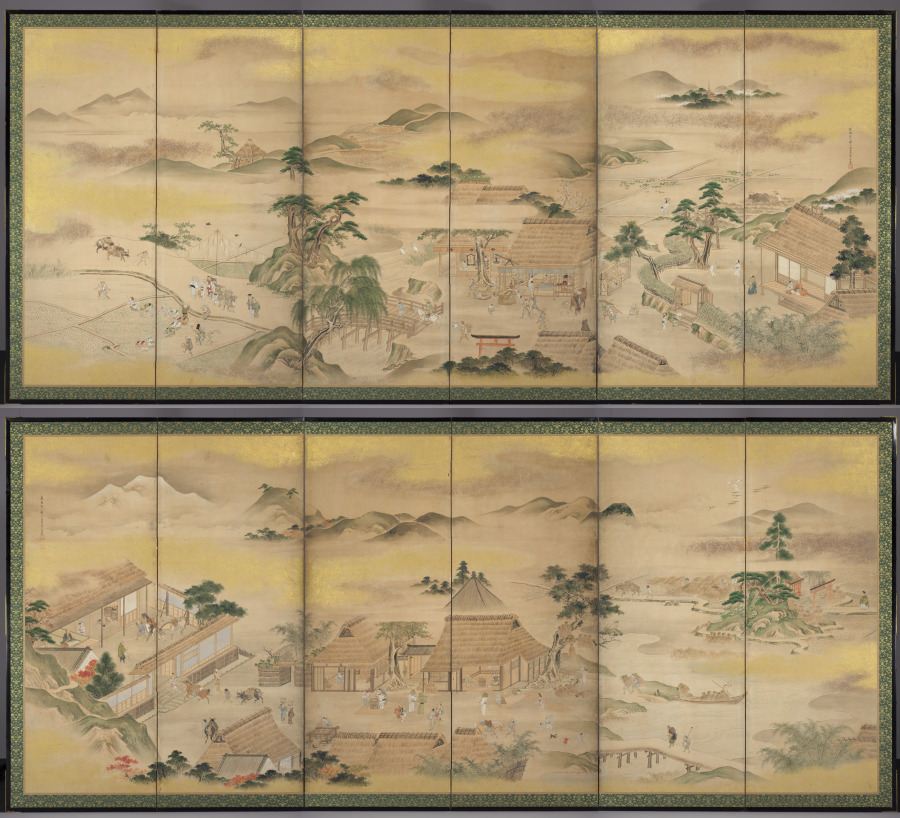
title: Spring and Autumn Farming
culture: Japan, Edo period (1615–1868)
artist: Kō Sūkoku (Japanese, 1730–1804)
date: 1700s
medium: Pair of six-panel folding screens, ink, light color, gold, and silver on paper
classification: Painting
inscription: Signature of the artist: "Enrin san jin Rakushisai ko Sukoku ga" (each screen)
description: These screens present the cycle of the farming year, starting with spring at right and ending with fall at left. Close examination of these screens reveals moments of games and amusement, the enjoyment of meals as well as intellectual and spiritual pursuits interspersed among the scenes of cultivating and preparing the rice harvest. The artist Kō Sūkoku is considered the 18th-century heir in style and attitude to Hanabusa Itchō (1652–1724). Itchō’s work incorporated elements from Kano school, ukiyo-e, and literati styles of painting. Kō trained with one of Hanabusa’s pupils, Sawaki Sūshi, who was best known for scenes depicting everyday life and customs.